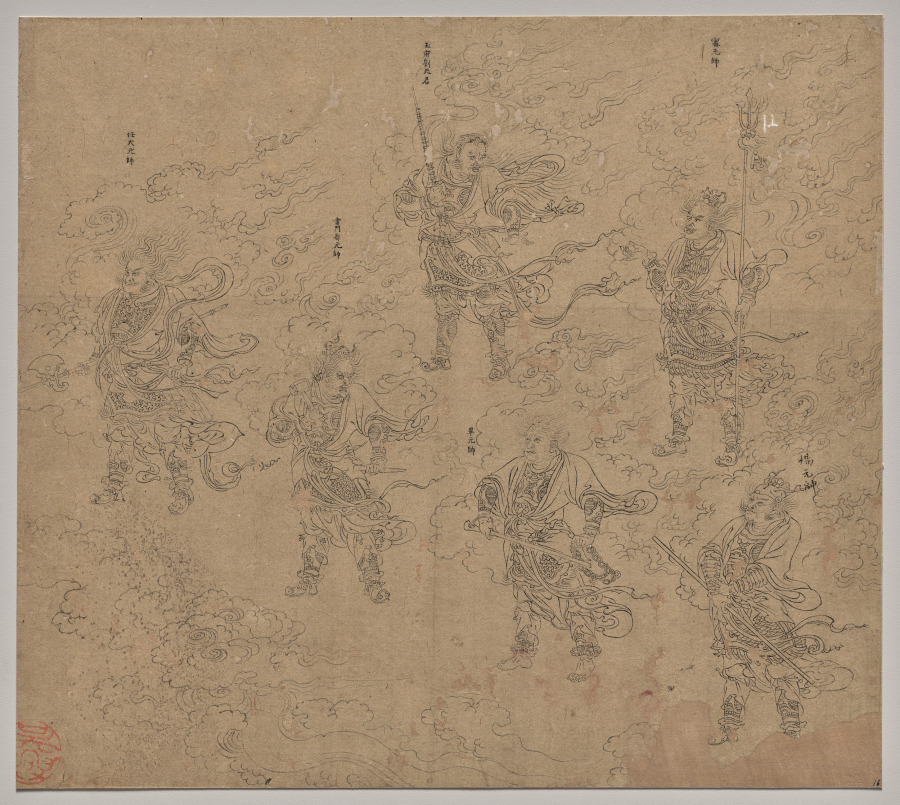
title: Album of Daoist and Buddhist Themes: Procession of Daoist Deities: Leaf 16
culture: China, Southern Song dynasty (1127-1279)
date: 1200s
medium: Album, ink on paper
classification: Painting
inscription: 楊元帥; 甯元帥; 畢元帥;玉府劉天君; 雷門苟元帥; 任大元帥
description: The upper most figure in the center of the composition is the Heavenly Lord Liu Hou 劉後. He is accompanied by five Field Marshals of the Daoist pantheon dressed in military garb are, from right to left, Yang Biao 楊滮, Ning Shikua 甯世夸, Bi Zongyuan 畢宗遠, Gou Leiji 苟雷吉, and Ren 任.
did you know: The inscription identifying the Field Marshal on the lower right was written in larger, more casual calligraphy than any other in the album.